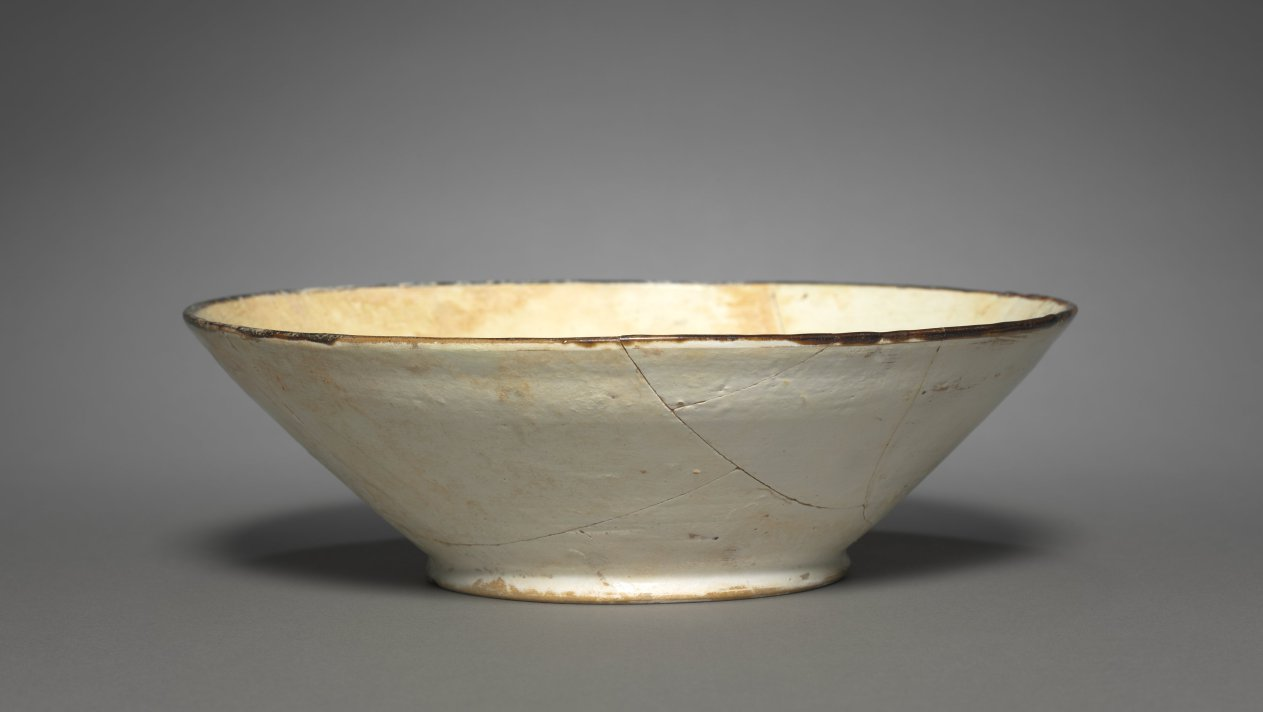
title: Bowl with Two Birds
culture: Iran, Nishapur or Central Asia, Samarkand, Samanid Period, 10th century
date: 900s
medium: earthenware with underglaze slip-painted decoration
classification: Ceramic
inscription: On body of each bird is a highly stylized inscription, probably the Arabic work baraka ("blessing").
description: Two facing birds painted with dark brown slip (clay diluted with water) on a plain white slip ground were a popular decoration in eastern Iran. A stylized Arabic word, baraka (blessing), appears on each bird’s body.